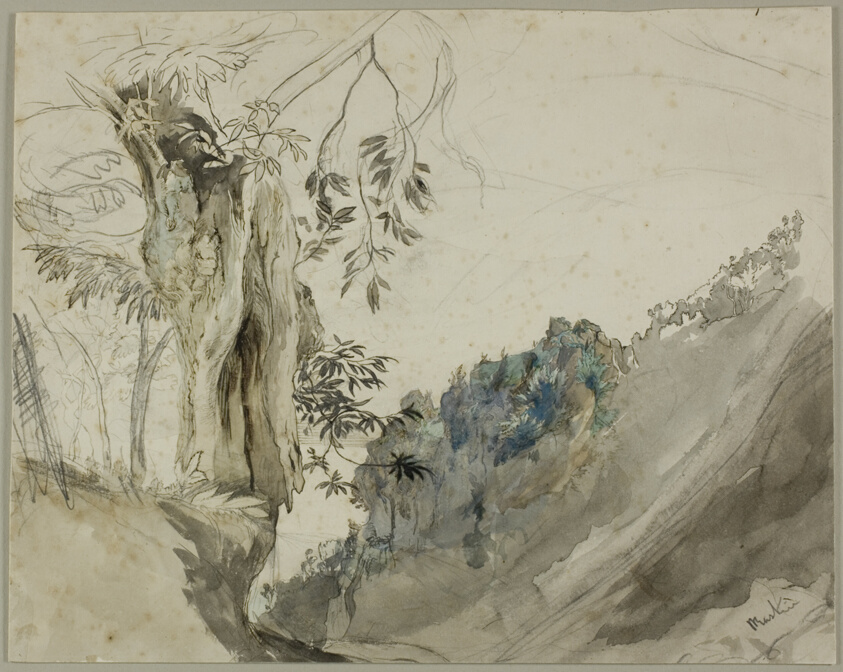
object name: Drawing and Watercolor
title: Spanish Chestnut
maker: John Ruskin (English, 1819-1900)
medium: Pen and brown ink, with brush and watercolor, over graphite, on ivory wove card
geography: England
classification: watercolor; drawings (visual works); prints and drawing